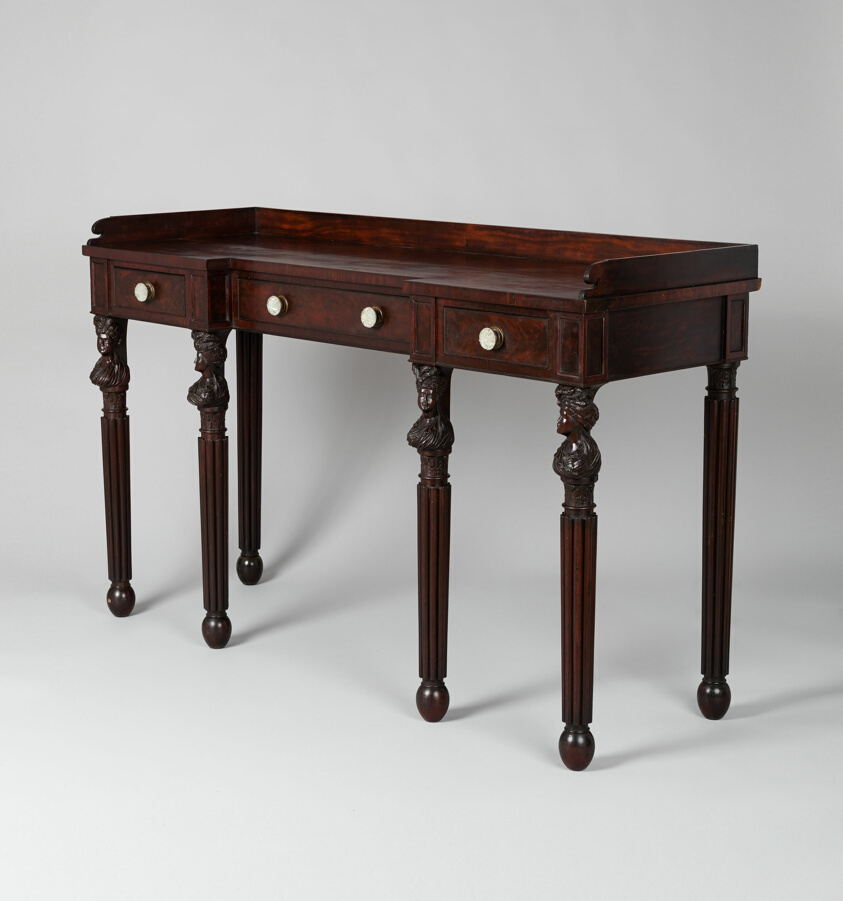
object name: Furniture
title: Sideboard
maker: Attributed to Edward Priestley; American, 1778–1837; Baltimore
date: c. 1820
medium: Mahogany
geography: Baltimore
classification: furniture